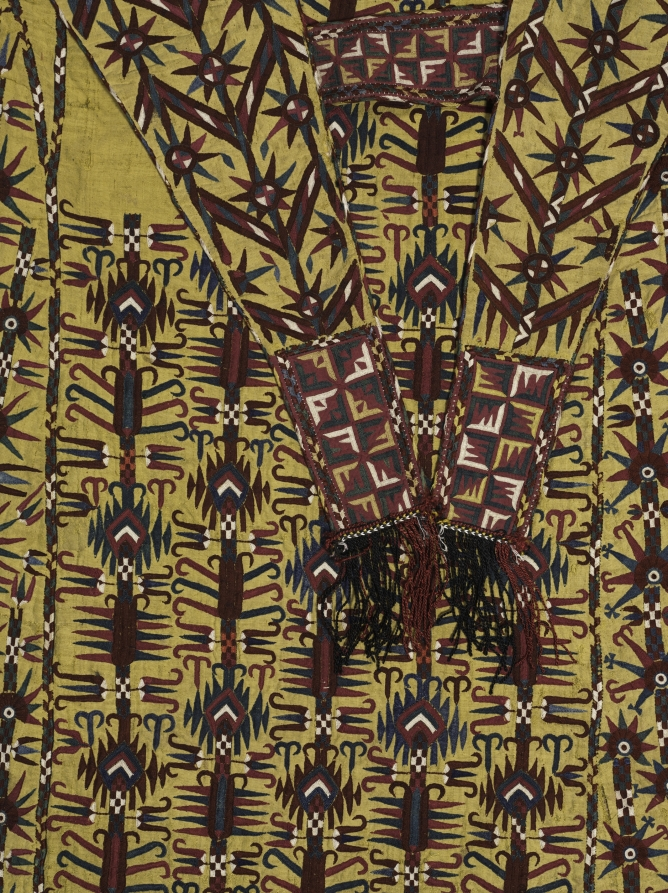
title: Woman’s Mantle (Chyrpy)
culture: Central Asia, Turkmenistan, Tekke tribe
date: late 1800s–early 1900s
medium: Exterior: silk; plain weave; embroidery: chain stitch; Trim: silk; tablet-woven with fringe; Lining: cotton; plain weave, block printed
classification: Garment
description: Traditional costumes in central Asia have distinctive characteristics that indicate ethnicity, age, and class. One of the oldest examples is a woman’s coat with false sleeves attached on the back and worn over the head. This silk coat in yellow, the color worn by middle-aged women, is elaborately decorated with popular stylized tulips embroidered in chain stitch. Worn consistently by a newlywed, the coat was later only used on special occasions. Although women made and embroidered garments at home, this expensive luxury mantle was professionally made and sold in the marketplace.